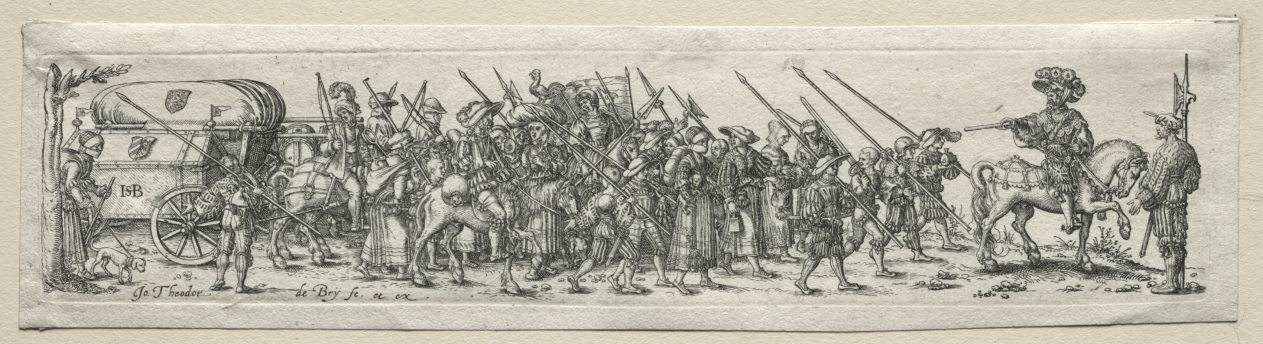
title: The Baggage Train with the Sergeant Major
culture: Flanders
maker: Johann Theodor de Bry (German, 1561–1623)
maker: after Hans Sebald Beham (German, 1500–1550)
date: 1584–1623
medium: engraving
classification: Print